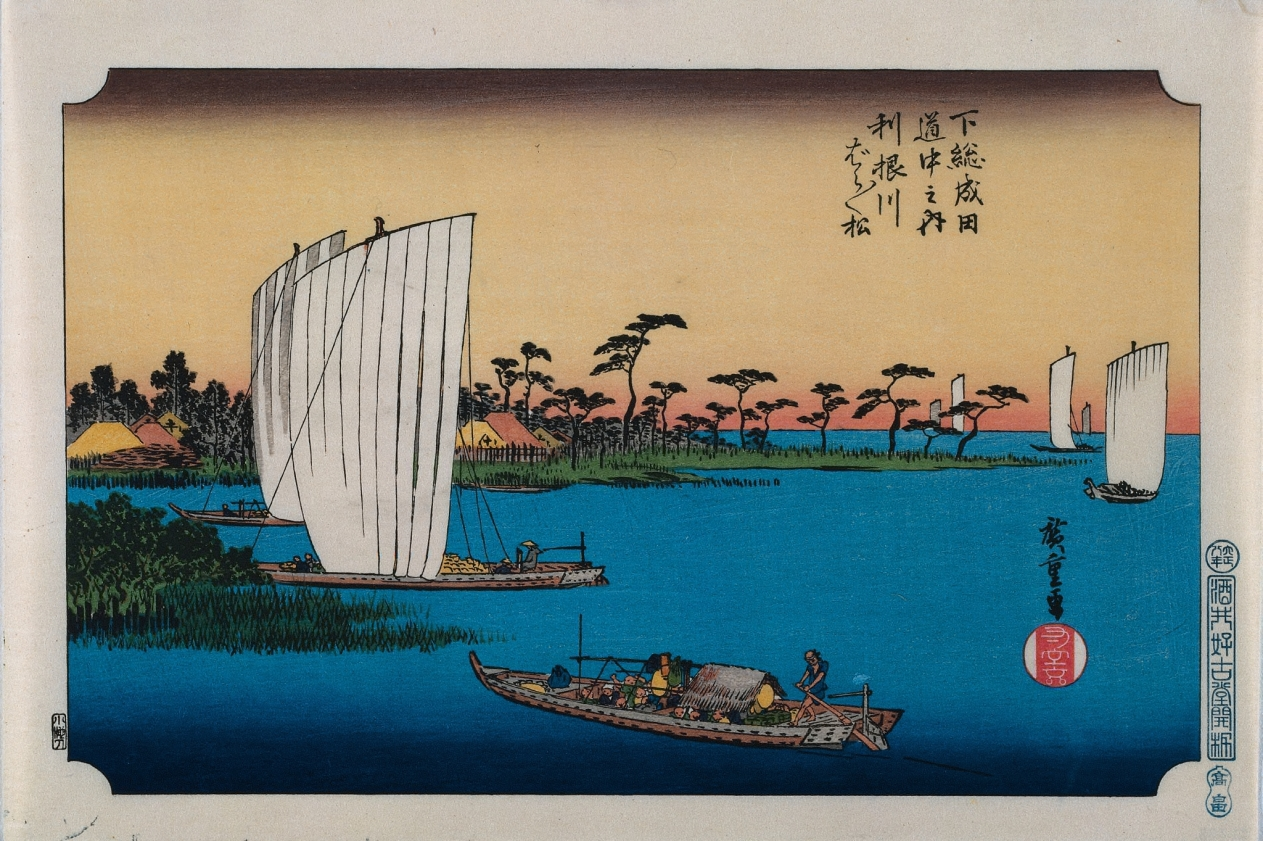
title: Scattered Pine Trees by the Tone River, from the series The Road to Narita in Shimosa Province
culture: Japan, Taishō period (1912–26)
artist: Utagawa Hiroshige (Japanese, 1797–1858)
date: published in 1919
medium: color woodblock print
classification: Print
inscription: Signature: Hiroshige ga Artist Seal: Ichiryusai Publisher: Sakai Kokodo kaihan